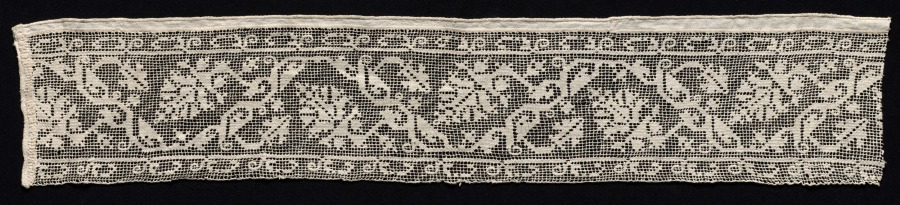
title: Fragment of a Band with Vines and Leaves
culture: Italy, 1600s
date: 1600s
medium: Bleached linen (est.): needle lace, filet/lacis (knotted ground and darned in one and two directions)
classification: Lace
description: A scrolling vine with budding vegetation or a tendril is a recurring pattern in needle lace. The frequent use of the motif, adapted in lace from different centuries and regions, suggests that it was found in a pattern book.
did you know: Books of patterns for lace making and other needlework were aimed at well-to-do women and girls to encourage domestic virtue.